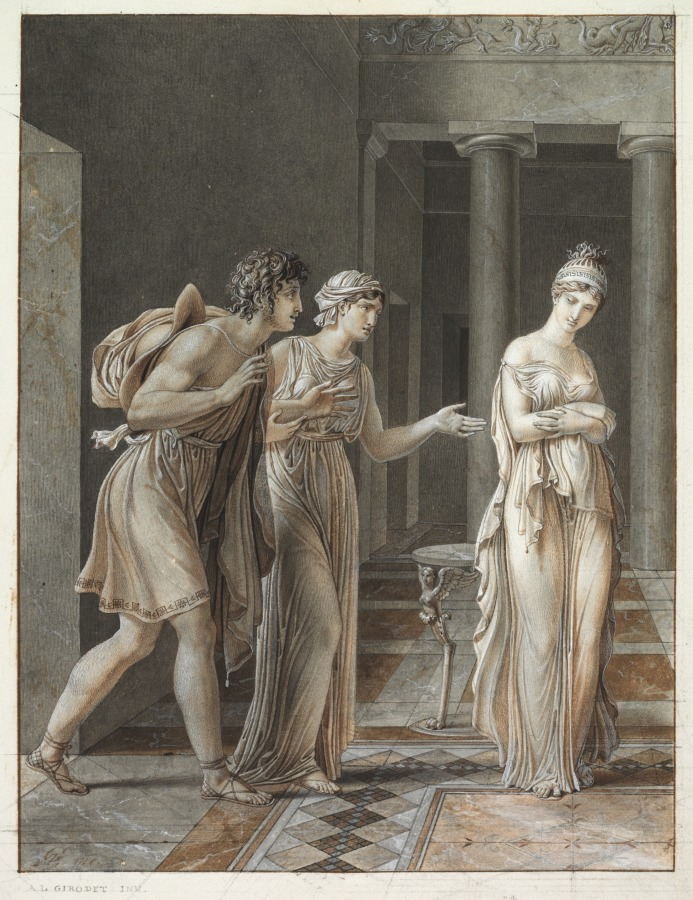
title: The Meeting of Orestes and Hermione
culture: France, early 19th Century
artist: Anne-Louis Girodet de Roucy-Trioson (French, 1767–1824)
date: c. 1800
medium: pen and brown and black ink, point of brush and brown and gray wash, with black chalk and graphite, heightened with white gouache, on cream wove paper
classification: Drawing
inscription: signed, lower left, in brown ink: ALG [artist’s monogram] / INV.; lower left, in black chalk: A L GIRODET INV.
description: When the French painter Jacques-Louis David was approached to work on a new edition of Jean Racine’s plays, he passed the task to his pupil Girodet, who excelled at illustrating literature. This highly refined drawing depicts a scene from Racine’s Andromaque, a complicated story of unrequited love and political treachery. Cléone introduces the love-blind Orestes to Hermione, who exploits his affection to make him do her bidding. Girodet skillfully contrasts Orestes’s eagerness and Hermione’s calculating character. With folded arms, she turns away, as if a statue between the columns of a cool marble interior. Yet Hermione’s sly, backward glance alerts the viewer of her cunning manipulation, which eventually drives Orestes mad.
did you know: The leg of the table behind Hermione has the form of a siren, a dangerous mythological creature that destroys anyone who hears its song.